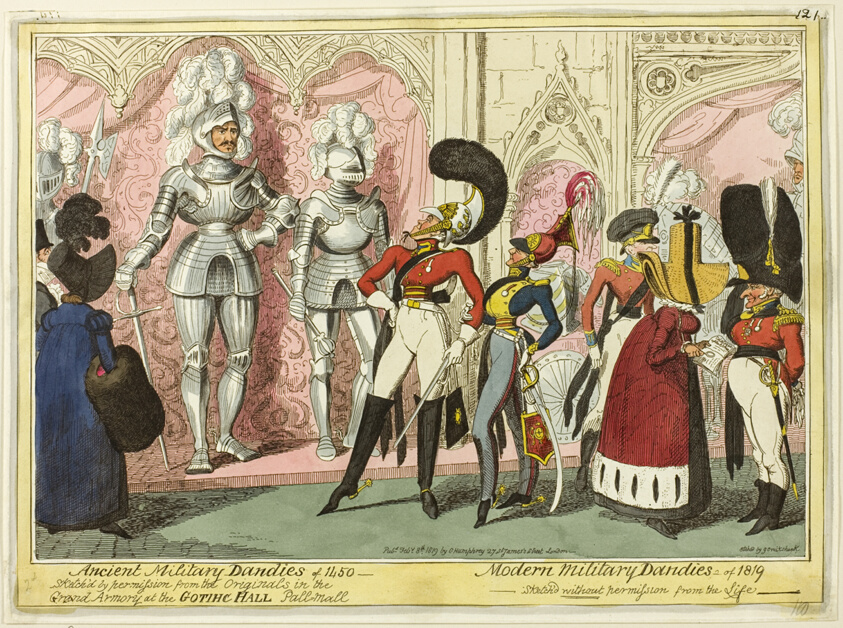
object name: Print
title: Ancient and Modern Military Dandies of 1450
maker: George Cruikshank (English, 1792-1878); published by George Humphrey (English, c. 1773-1831)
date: published February 8, 1819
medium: Hand-colored etching on paper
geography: England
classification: etching; print; prints and drawing